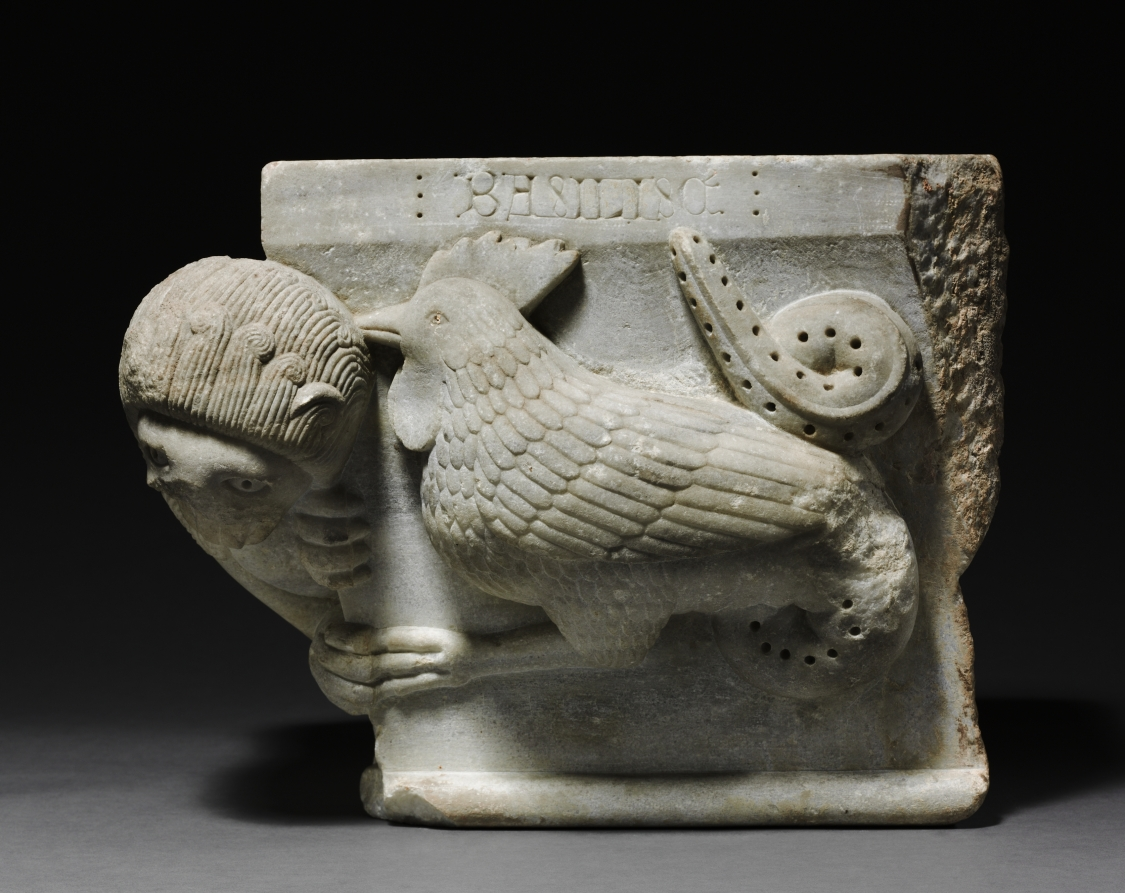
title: Engaged Capital with a Lion and a Basilisk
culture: Northern Italy, Emilia (Bologna?), 12th century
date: 1175–1200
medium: marble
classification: Sculpture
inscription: BASILISC.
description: The basilisk is an imaginary animal, half cock and half snake. According to medieval bestiaries, the basilisk could kill merely by its glance. It was commonly held as the symbol of the devil to be trodden down by Christ, first at the moment of his incarnation and then again during the Last Judgment.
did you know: This capital depicts a struggle between the good lion and the evil basilisk, a legendary reptile from myth. While the artist would not have encountered the mythical serpent, it is likely he never saw a real lion either based on its cartoonish appearance in this sculpture.